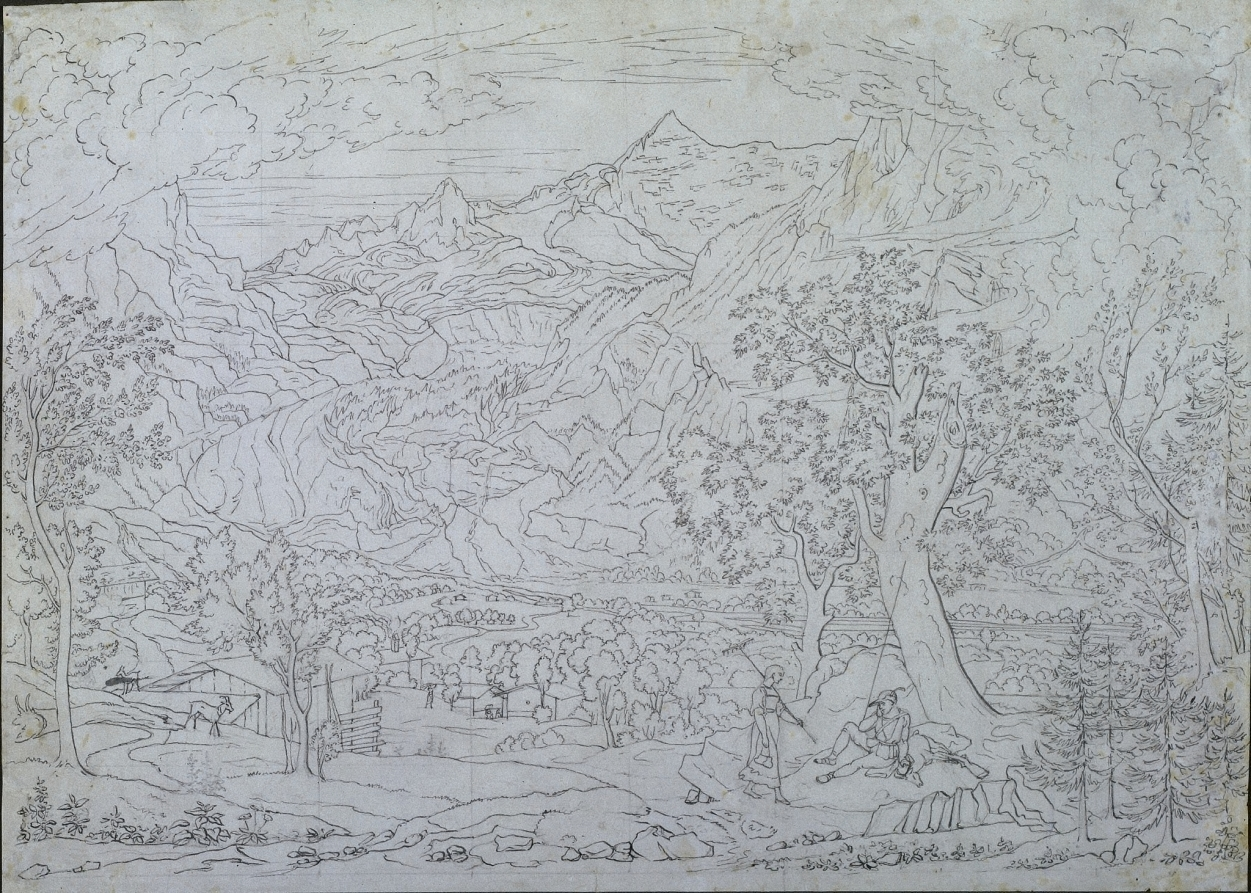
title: The Grindelwald Glacier with Hunter and Peasant Girl in Foreground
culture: Austria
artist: Joseph Anton Koch (Austrian, 1768–1839)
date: c. 1823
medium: pen and gray ink over graphite, squared in graphite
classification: Drawing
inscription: VERSO, upper left, in graphite: 20/600 ; upper right, in graphite: 3 [circled] ; lower left, in graphite: Ar[illegible] ; lower right, in graphite: 121 [underlined and sideways]